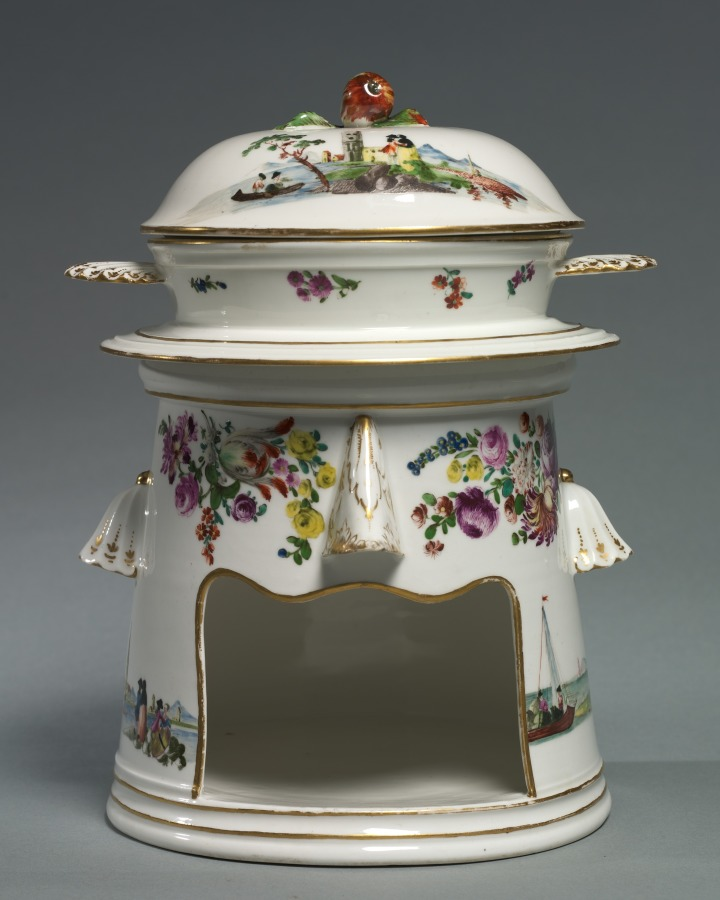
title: Food Warmer (Veilleuse)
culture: Germany, Nymphenburg, 18th century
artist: Nymphenburg Porcelain Factory (German, founded 1747)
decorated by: probably by Georg Christoph Lindemann (German)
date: c. 1758–1760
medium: porcelain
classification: Ceramic